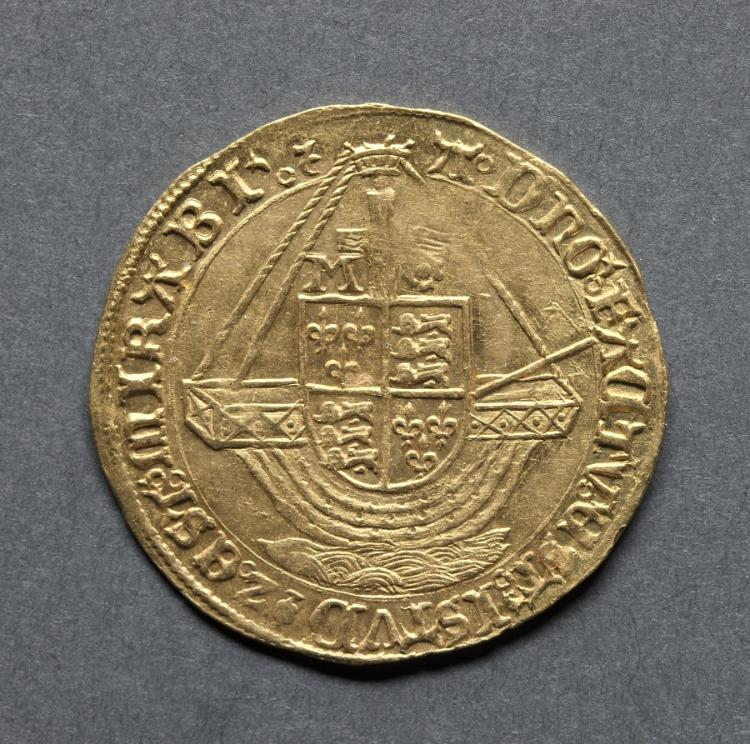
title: Angel: Ship with Shield of Arms (reverse)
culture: England, Mary, 1553-1554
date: 1553–1554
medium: gold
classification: Coins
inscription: A DNO FACTV EST ISTVD Z EST MIRABI